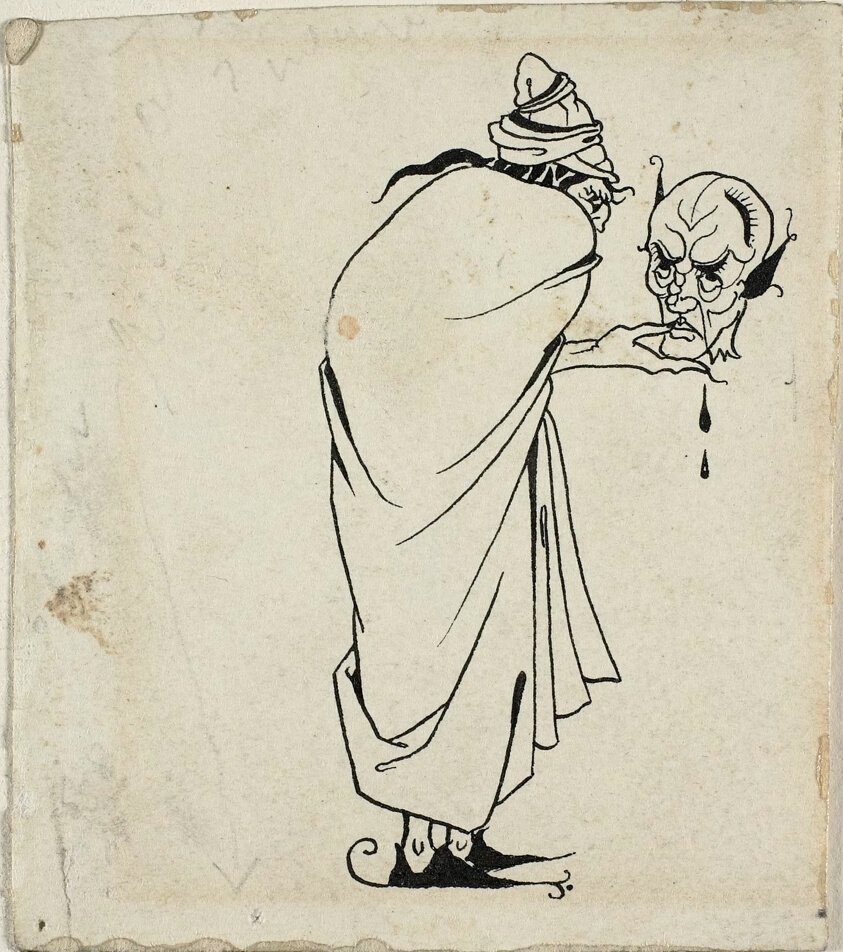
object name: Drawing and Watercolor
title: Man with Skull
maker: Aubrey Vincent Beardsley (English, 1872-1898)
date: 1892/98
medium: Pen and ink on ivory wove paper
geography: England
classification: pen and ink drawings; drawings (visual works); prints and drawing